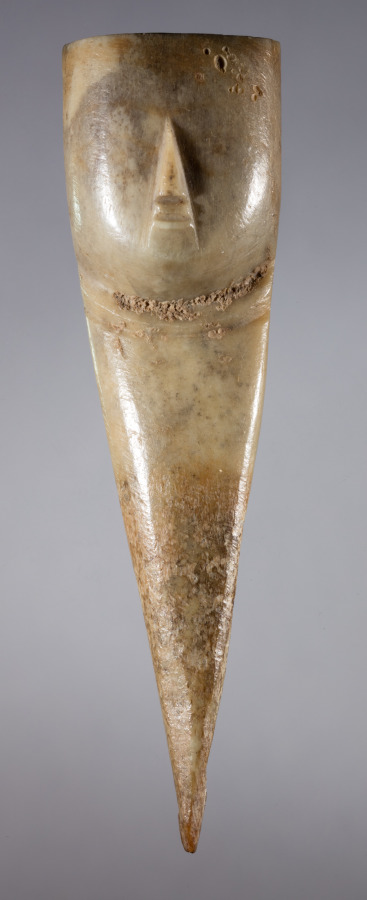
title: Figurine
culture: Iran, early Islamic period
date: 700s–900s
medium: bone, carved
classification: Miscellaneous